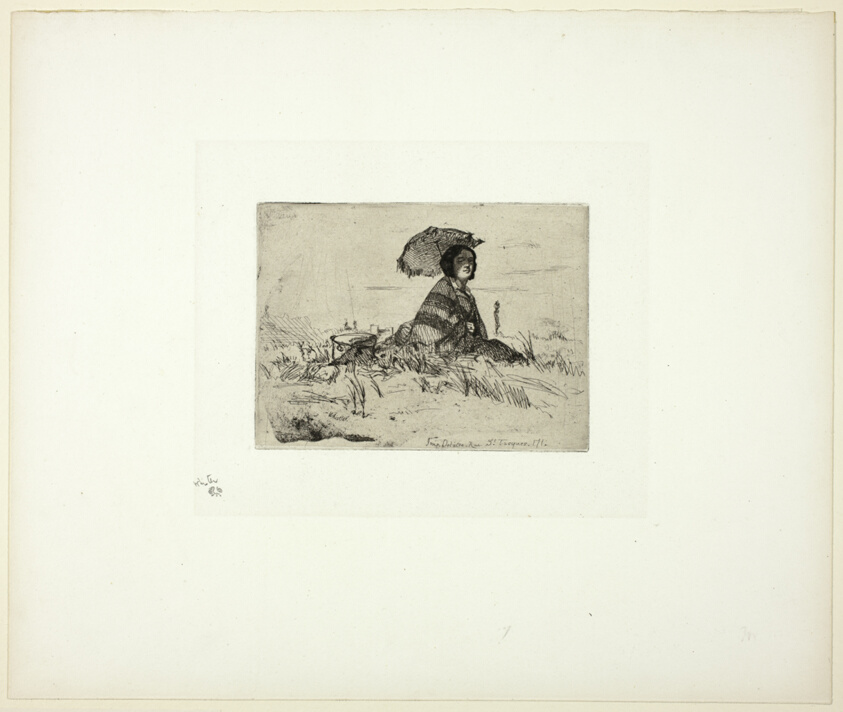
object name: Print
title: En Plein Soleil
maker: James McNeill Whistler (American, 1834-1903)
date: 1858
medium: Etching with foul biting in black ink on off-white China paper laid down on off-white wove paper (chine collé)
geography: United States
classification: etching; foul biting; print; prints and drawing; paper